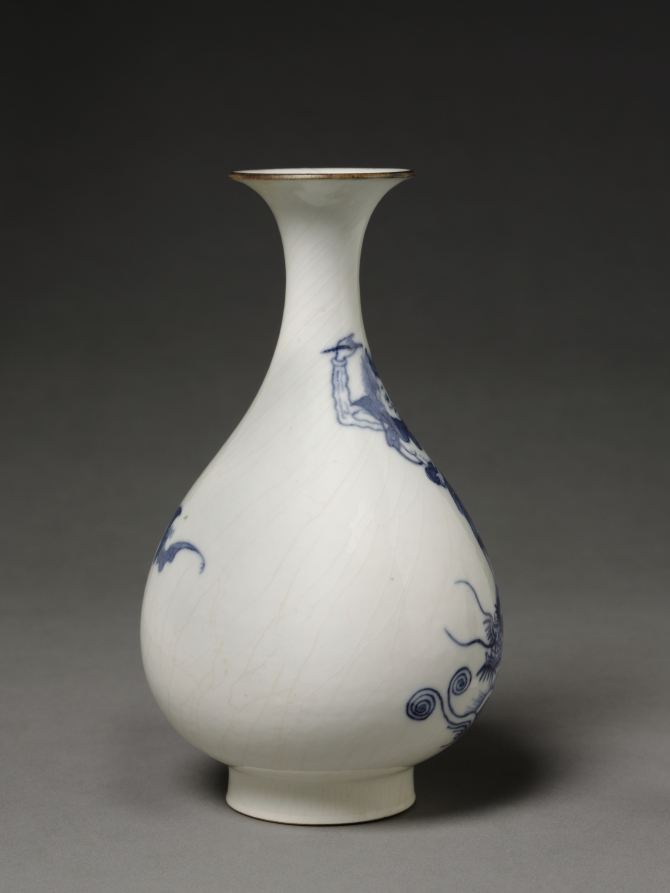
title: Pear-Shaped Vase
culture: China, Jiangxi province, Jingdezhen kilns, Qing dynasty (1644-1911), Yongzheng reign (1723-35)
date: 1723–35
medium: porcelain with underglaze blue decoration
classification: Ceramic